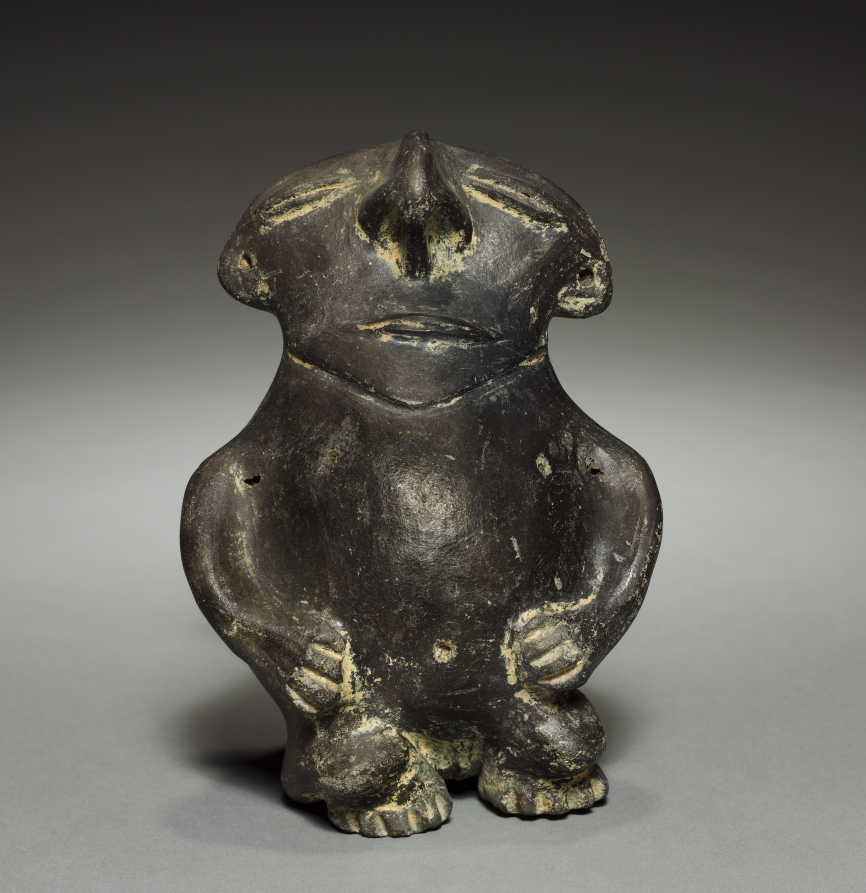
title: Figurine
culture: Colombia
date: before 1921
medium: pottery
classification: Ceramic